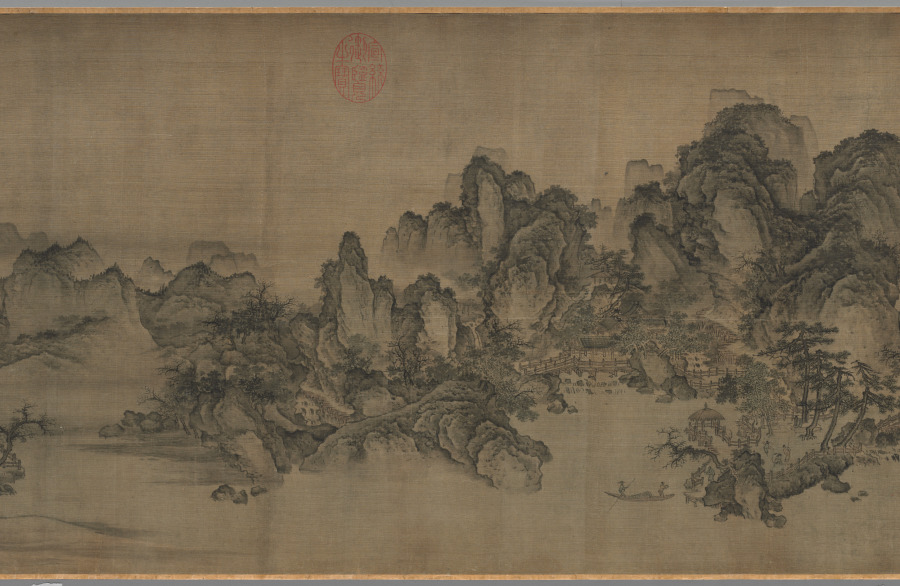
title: Streams and Mountains without End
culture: China, late Northern Song dynasty (960-1127) - Jin dynasty (1115-1234)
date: 1100–1150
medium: handscroll; ink and slight color on silk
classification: Painting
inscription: 9 colophons and 48 seals: 1 colophon, dated 1205, of Wang Wenwei 王文蔚 (dates unknown); 1 colophon, dated 1205, of Li Hui 李惠 (dates unknown); 1 colophon of Weiluo Tian Xie 蔚羅田獬 (dates unknown); 1 colophon, dated 1214, of He Yan 何言 (dates unknown); 1 colophon, dated 1326, of Cao Yuanyong 曹元用 (d. 1329) 1 colophon, dated 1332, of Kangli Zishan 康里子山 (Naonao; 1295-1345); 1 colophon, dated 1336, of Liu Zai 劉載. (dates unknown); 1 colophon, dated 1380, and 4 seals of Yang Mao 楊懋 (1300-after 1380); 4 seals of the Hou family (ca. 1340); 1 colophon of Wang Duo 王鐸 (1592-1652); 4 seals of Zhang Bingqian 張秉乾 (juren of 1729); 8 seals of Liang Qingbiao 梁清標 (1620-1691); 2 seals of the Qianlong emperor (r. 1736-95); 4 seals of the Jiaqing emperor (r. 1796-1820); 3 seals of the Xuantong emperor (r. 1909-11); 2 seals of Ye Gongchuo 葉恭綽 (1881-1968); 17 seals of Zhang Yuan 張爰 (Zhang Daqian 張大千, 1899-1983).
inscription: Colophon 1. Wang Wenwei 王文蔚. Dated third month and third day, 1205, under the reign of Zhangzong of the Jin dynasty. 造物元無心，山川秀氣聚。畫手亦無盡，各出新意度。 誰將妙林泉，淡墨寫縑素。重巒疊嶂間，三兩人家住。 茅舍隔素籬，小橋通細路。溪上數葉舟，雅有物外趣。 嵓崦藏招提，依稀認窗戶。山色四時宜，雲煙自朝暮。 不知塵世中，此景在何處。收拾買山錢，投老好歸去。 泰和乙丑三月三日平原王文蔚謹再拜，書于河東縣署之野趣堂。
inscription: Colophon 2. Li Hui 李惠. The colophon was written three days before the Qingming Festival in 1205. 畫師慣在山中居，含毫吮墨聊自娛。 閑將一段冰霜絹，寫出千里江山圖。 前山後山互出沒，山腰林樾相縈紆。 危橋澗溜瀉鳴玉，山根一匯為平湖。 波平短艇快漁釣，雲深細徑來樵蘇。 僊宮梵宇占幽勝，雕欄複閣森蓬壺。 往來行客煙靄外，飄飄野店青帘孤。 人家雞犬聲相接，熙熙化日安唐宇。 嗟余嗜好何其迂，膏肓泉石真吾徒。 一行作吏墮世網，薄書汨沒勞奔趨。 千巖萬壑但夢想，故園三徑應將蕪。 披圖暫洗黃塵眼，拊膺三嘆空踟躕。 泰和乙丑清明前三日絳臺李惠書于舜城府署之九思堂。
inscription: Colophon 3. Weiluo Tian Xie 蔚羅田獬. 畫工紛紛不可紀，擺脫俗流幾人耳。 夫誰援筆掃鵝溪，一段風煙且千里。 白波青嶂渺無窮，水接山兮山插水。 小橋野店相勾連，古寺樓臺突兀起。 飄然氣象與神俱，但患未明孰姓氏。 郭熙雖老典型存，為問主公無乃是。 此畫世希當寶藏，無與碌碌同一視。 更看卷首數公詩，奇絕清新相表裏。 蔚羅田獬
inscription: Colophon 4. He Yan 何言. Written in 1214. 萬有來自無，一真歸所託。畫師得三昧，胸中幻丘壑。 百態逐墨破，群形隨筆落。地近迹分明，天遙痕隱約。 雲物自吐吞，峯巒非斧鑿。江鄉閴無市，谷關常不鑰。 中有野夫閑，童琴而歩鶴。酒斾出籬懸，漁舟臨岸泊。 澗樹蔽橋樑，巖松迷殿閣。岑疊宿霧重，野曠林煙薄。 危棧接縈紆，亂泉通脈絡。途中人往來，僕馬何羸弱。 怪石虎踡跼，古木龍蟠錯。一幅宜好收，千金非易博。 玉堂閑卷舒，眼界增寥廓。視險尚寛平，見危除慘虐。 氣象溢國華，川澤資廟略。功名業已書，歸去鞭先著。 但知色即空，何是今非昨。飽乎仁智心，箇中無限樂。 貞祐甲戌秋暮，東營何言題。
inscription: Colophon 5. Cao Yuanyong 曹元用 (d. 1329). Dated 1326. 岸擁危橋斷，溪浮小艇斜。 萬山最深處，依約兩三家。 泰定丙寅秋，曹元用題。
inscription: Colophon 6. Kangli Zishan 康里子山 (i.e., Kangli Naonao). The colophon bears a date of 1332. 右溪山圖，意韻蕭灑。一見使人有烟霞之想，真可珍藏。又有□金諸名勝題詩其左。兵火之餘， 殊不易得也。 至順三年暮春之月，康里子山跋。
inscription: Colophon 7. Liu Zai 劉載. 雲拂埜田閑種玉，雨餘巖溜碎傾金。 幾時也結團茆去，麟閤恬然不挂心。 至元二年正月，長安劉載載之謹錄上。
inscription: Colophon 8. Yang Mao 楊懋 (1300–after 1380). 觀此圖，經營位置，筆法高古，山明石潤。其橋梁、路道、樹林、人物、遠近；一一誠得真山水之深趣。非當時名筆有大才者不能至此。不必問其誰何，可為神品。况宋金元三朝名公所跋，尚不能記，想其來尤遠矣。然而物經累變而尚存，是物之有壽者也。余不復再論。文顯其保之。洪武庚申春，八十翁楊懋觀。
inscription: Colophon 9. Wang Duo 王鐸 (1592–1652). 文蓀親翁博雅，文詩鴻暢。舍弟持此喜觀，遂抽管題數語： 山勢委折，筆墨無痕。宋人中如此不多見也。譬之兵家，當是韓白。王鐸。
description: Streams and Mountains without End was a landmark acquisition of 1953, made just a year after Sherman Lee had returned to Cleveland as curator of Oriental art. He acquired it with the intention to provide "a more than adequate foundation for a fine collection of Chinese landscape painting." This impressive work demonstrates the culmination of stylistic developments in Chinese monumental landscape painting following the Northern Song tradition. It represents a journey through a landscape, making it a fitting metaphor for Lee’s journey of discovery and achievement over a lifetime.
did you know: The portrayal of the distant lands is rich with details like pavilions, villages, and human activities.